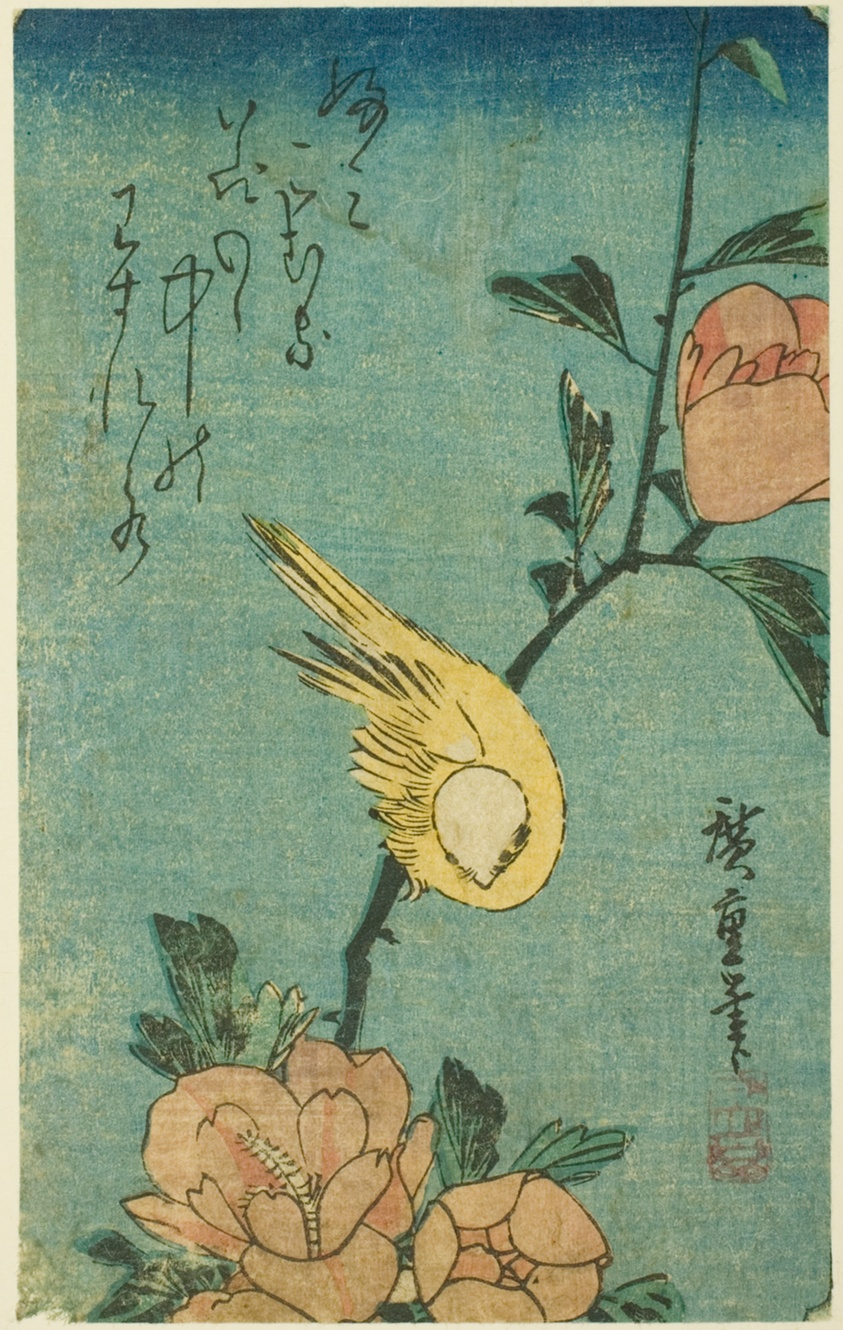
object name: Print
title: Yellow bird and hibiscus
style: Japanese (culture or style)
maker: Utagawa Hiroshige 歌川 広重; Japanese, 1797-1858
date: c. 1830s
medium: Color woodblock print; yotsugiriban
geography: Japan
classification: print; asian art